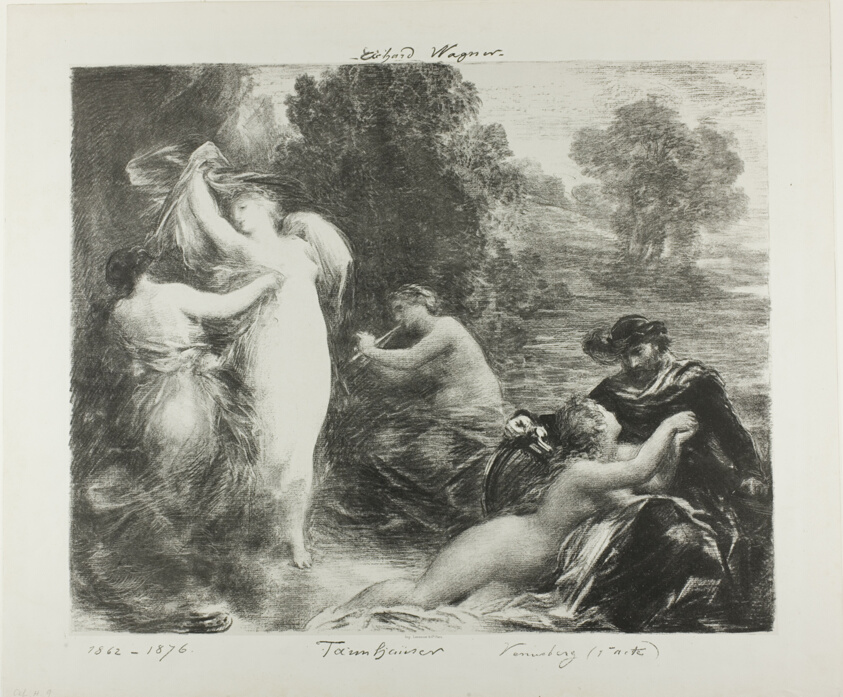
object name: Print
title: Tannhäuser: Venusberg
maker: Henri Fantin-Latour (French, 1836-1904)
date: 1876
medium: Lithograph in black with scraping on stone on grayish-ivory chine laid down on thick ivory wove paper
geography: France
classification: lithograph; print; prints and drawing